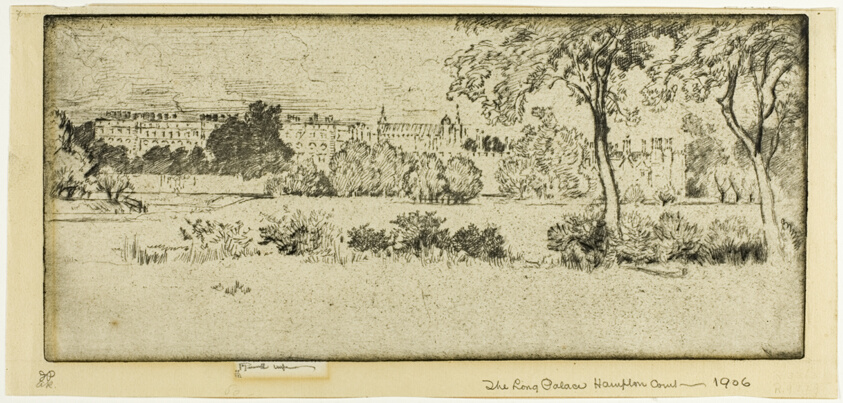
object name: Print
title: Hampton Court, the Long Palace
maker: Joseph Pennell (American, 1857-1926)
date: 1906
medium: Etching on ivory laid paper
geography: United States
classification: etching; print; prints and drawing